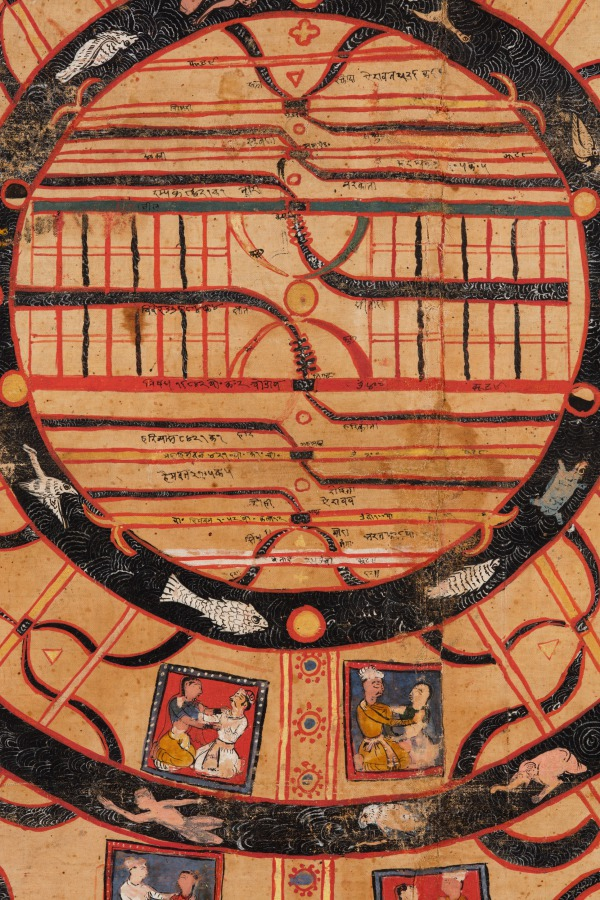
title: Diagrams of the Universe: The Two-and-a-Half Continents, the Universe in the Shape of a Person, and the Seven Levels of Hell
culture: Western India, Gujarat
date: 1613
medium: Gum tempera, ink, and gold on cloth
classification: Painting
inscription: saṃvat 1670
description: According to Jain cosmology, the universe is envisioned in the shape of a man. Above the waist are seven levels of heavens; below the waist are seven levels of hell. His midsection is the earthly realm, here shown as a round diagram with mountains and rivers, expanded at the left. The hell scenes are elaborated at the right.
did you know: The seven levels of hell depict various punishments as per Jain mythology.